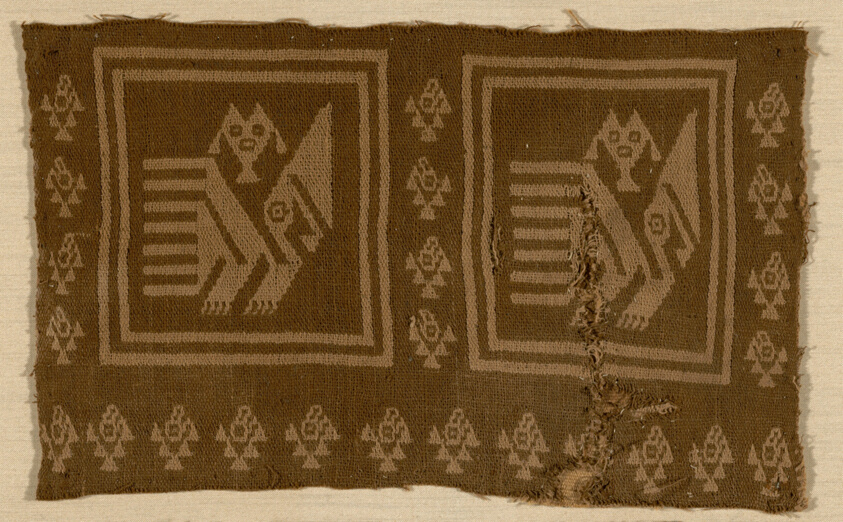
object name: Textile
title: Fragment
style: chancay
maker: Possibly Chancay; Possibly central coast, Peru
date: A.D. 1000/1476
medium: Double weave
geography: Peru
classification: textile; weaving